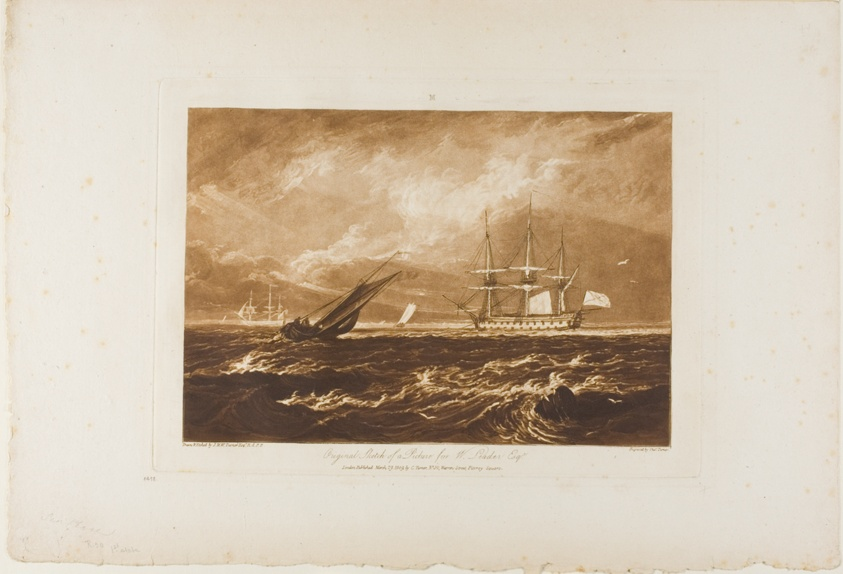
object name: Print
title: The Leader Sea Piece, plate 20 from Liber Studiorum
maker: Joseph Mallord William Turner (English, 1775-1851)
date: published March 29, 1809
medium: Etching and engraving in brown on ivory paper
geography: England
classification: etching; print; prints and drawing